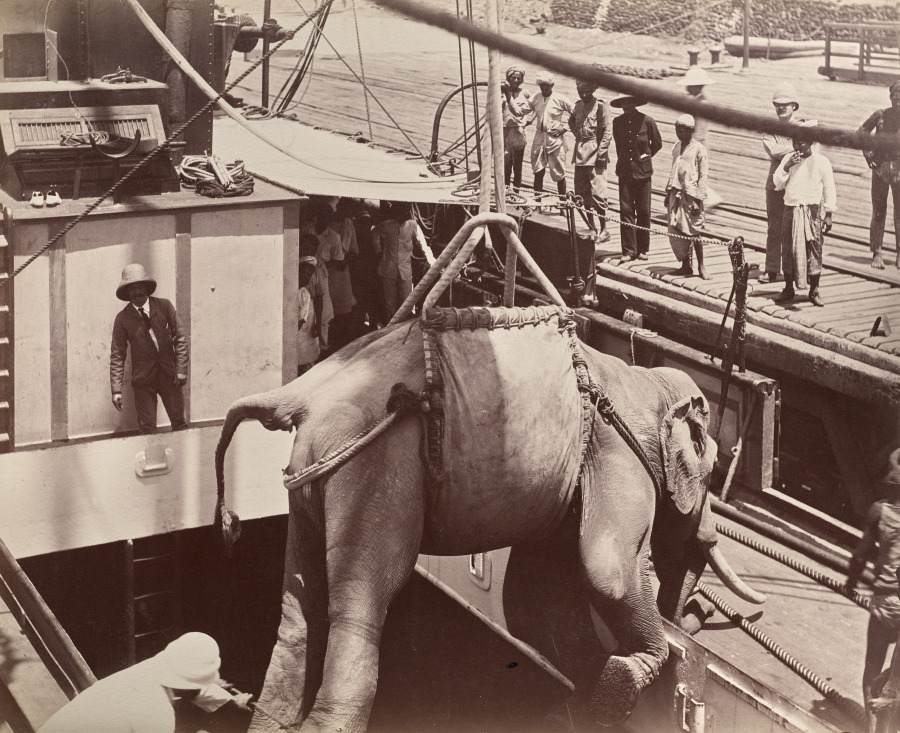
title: Untitled (elephant being loaded onto a ship, recto)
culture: England, 19th century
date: 1870s-1880s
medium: albumen print mounted on an album page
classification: Photograph